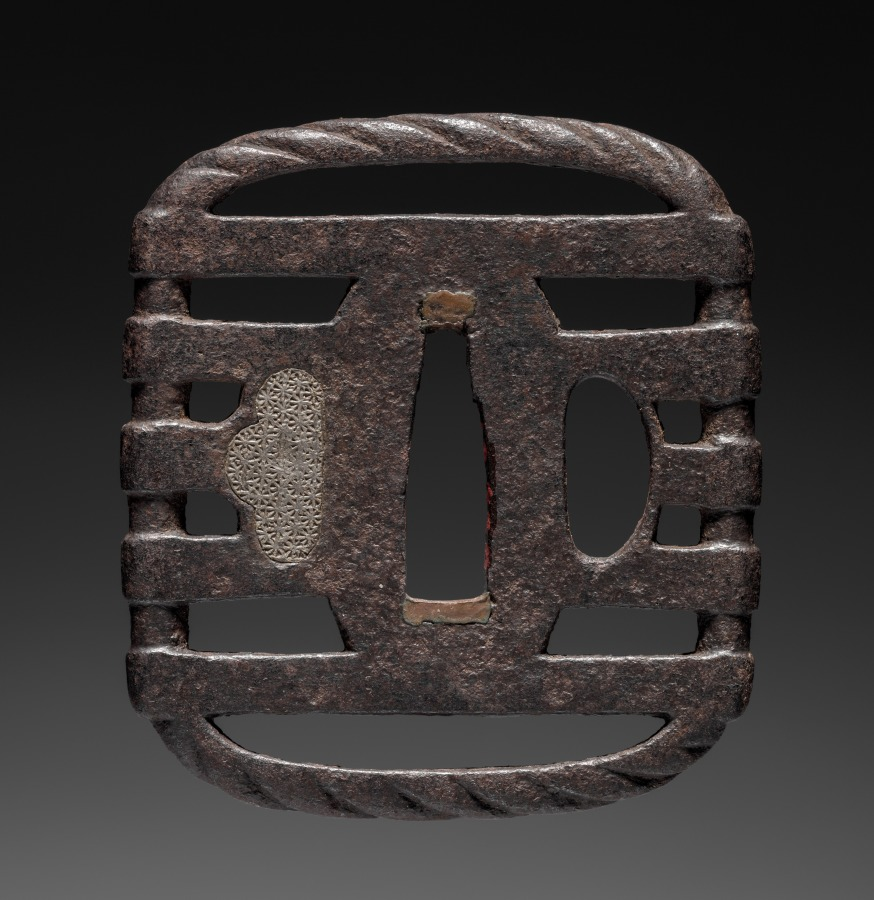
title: Sword Guard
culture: Japan, Edo period (1615–1868)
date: 1615–1868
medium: iron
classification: Arms and Armor